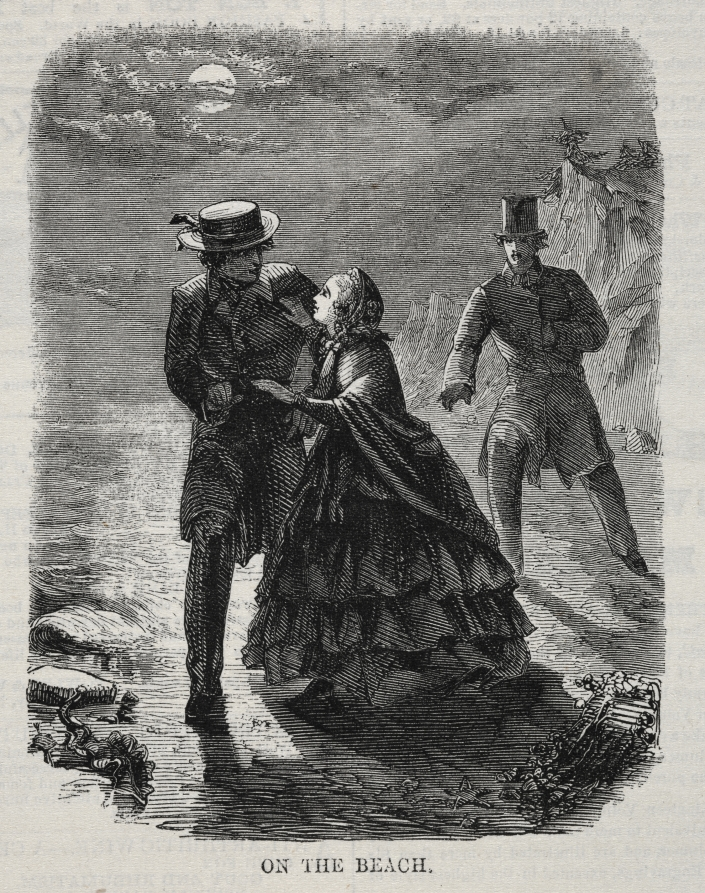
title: On the Beach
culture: America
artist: Winslow Homer (American, 1836–1910)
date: 1860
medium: wood engraving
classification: Print